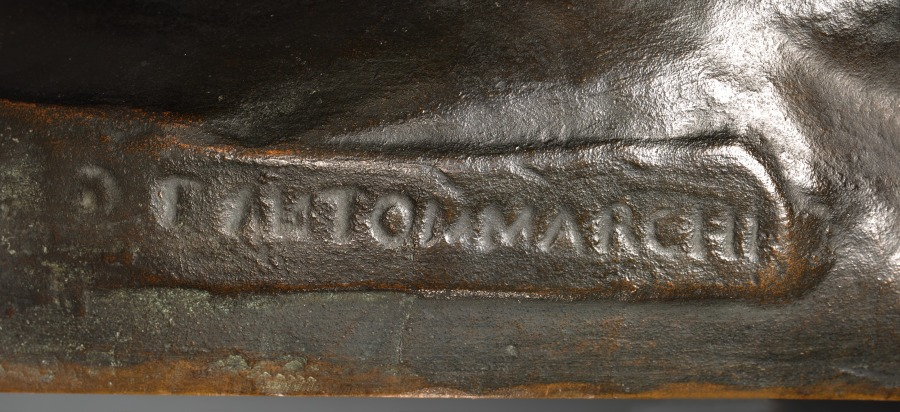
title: Mask of Napoleon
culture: Italy, 19th century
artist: C. Francesco Antommarchi (Italian, 1780–1838)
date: early 19th century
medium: bronze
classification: Sculpture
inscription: Signed on one side, inscribed on the other: "A Loie Fuller. E. Rudier, fondeur"